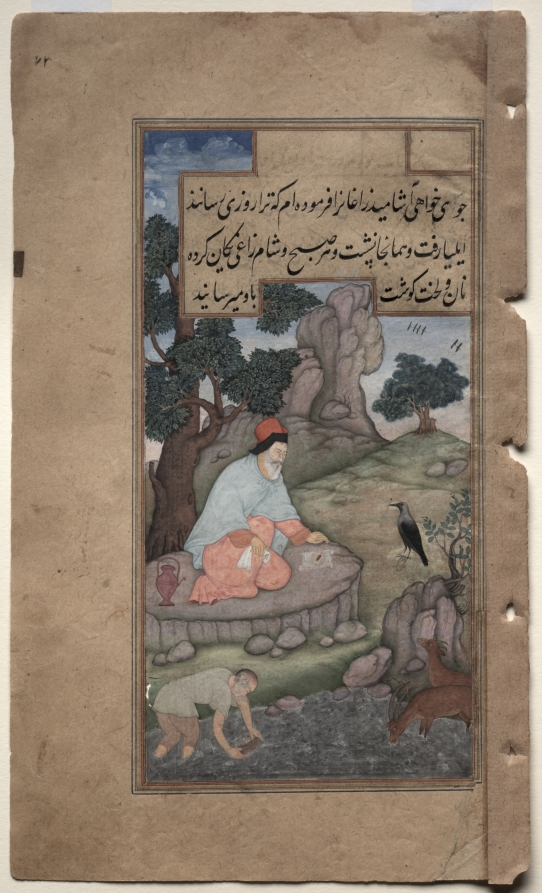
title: A raven brings food to Elijah (folio 72 recto), from a Mirror of Holiness (Mir’at al-quds) of Father Jerome Xavier,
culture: Mughal India, Allahabad, made for Prince Salim (1569–1627)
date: 1602–4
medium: Gum tempera, ink, color, and gold on paper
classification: Manuscript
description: The Old Testament prophet Elijah sits like an Indian holy man on a raised rocky platform under a tree. A raven has come to bring him bread and meat until the river runs dry, as commanded by God. Father Jerome recounted the story of Elijah to explain a reference made by Jesus in the context of his being rejected by the people of Nazareth, where he grew up. The unusual combination of Elijah’s salmon pink and light blue garments draws the viewer’s attention to him as the focus of the composition and echoes the paler hues of the sky.